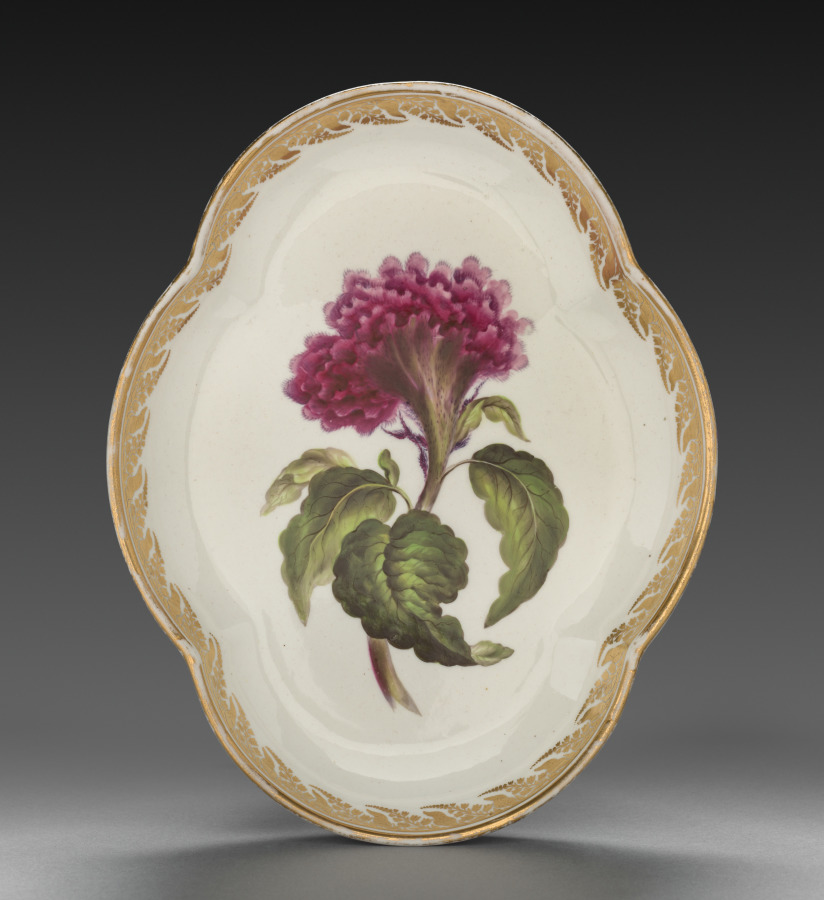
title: Quatrelobed Dish from Dessert Service: Coxcomb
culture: England, Derby, 18th century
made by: Derby (Crown Derby Period) (British)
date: c. 1800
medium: porcelain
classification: Ceramic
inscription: inscribed in blue on back: Amaranthus./Coxcomb./crown/crossed batons and dots/D/115.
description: Each dish is decorated with recognizable plants, the names of which are inscribed on the base in both Latin and English. Identifying the blossoms only became customary in the late 18th century when a single piece of porcelain was decorated with one species, and flowers were represented along with leaves, stems, seed pods, and roots. All of this reflects Carolus Linnaeus’s recent invention of a scientific method to categorize all known flora. The decorations on the Derby factory’s products derive from contemporary English botanical publications. For instance, illustrations in William Curtis’s The Botanical Magazine served as models for the French marigold and nettle-leaved bell flower on the dessert service.